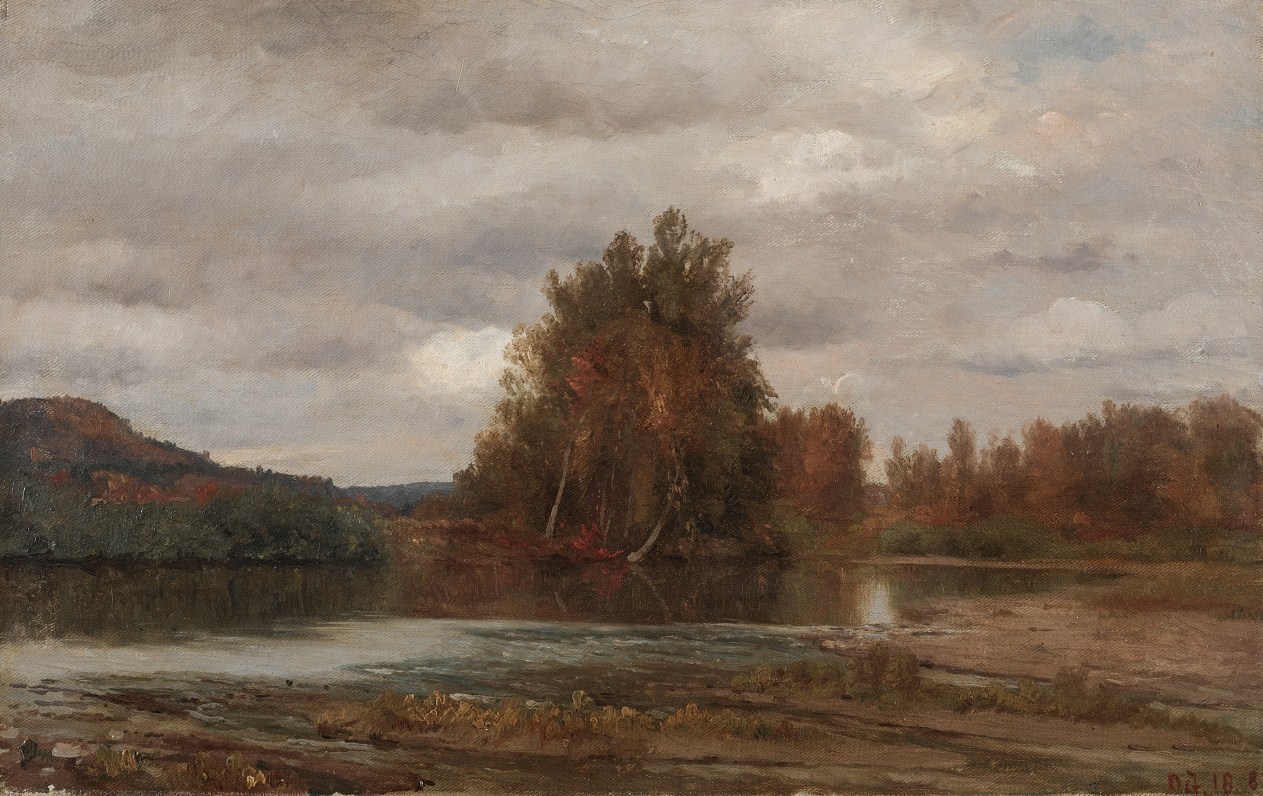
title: Gray Day on the Esopus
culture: America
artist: Jasper F. Cropsey (American, 1823–1900)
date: 1882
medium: oil on canvas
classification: Painting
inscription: Inscribed lower right: "Oct. 18, 82 [annotated on back: Grey Day on the Esopus]